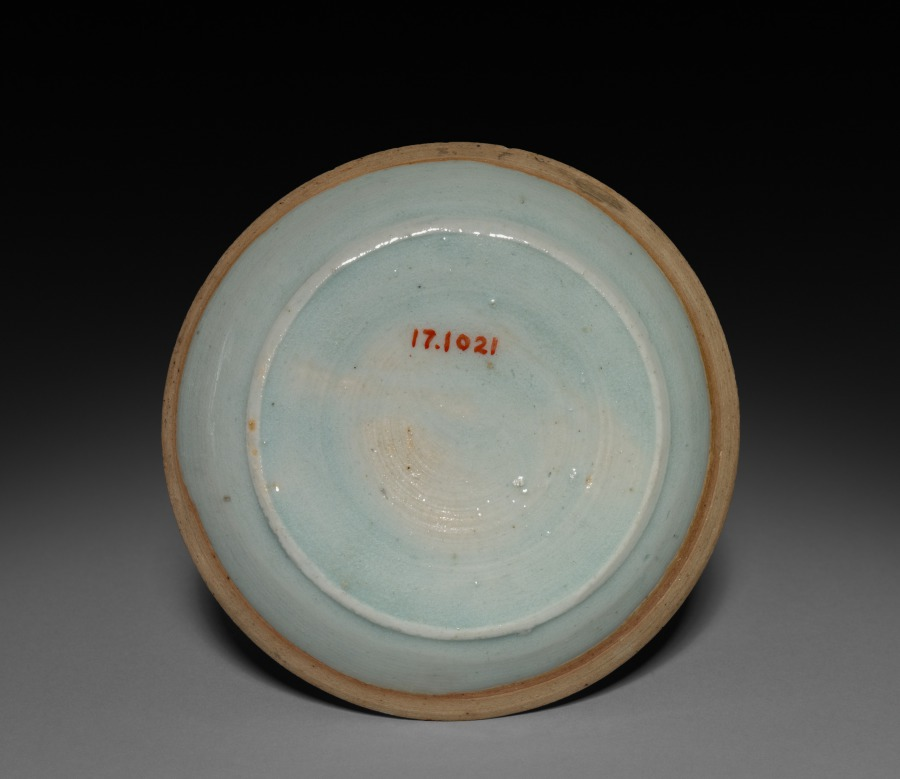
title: Saucer: Qingbai ware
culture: China, Southern Song Dynasty (1127-1279) - Yuan Dynasty (1271-1368)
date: 1200s-1300s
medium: porcelain with blue and white decoration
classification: Ceramic